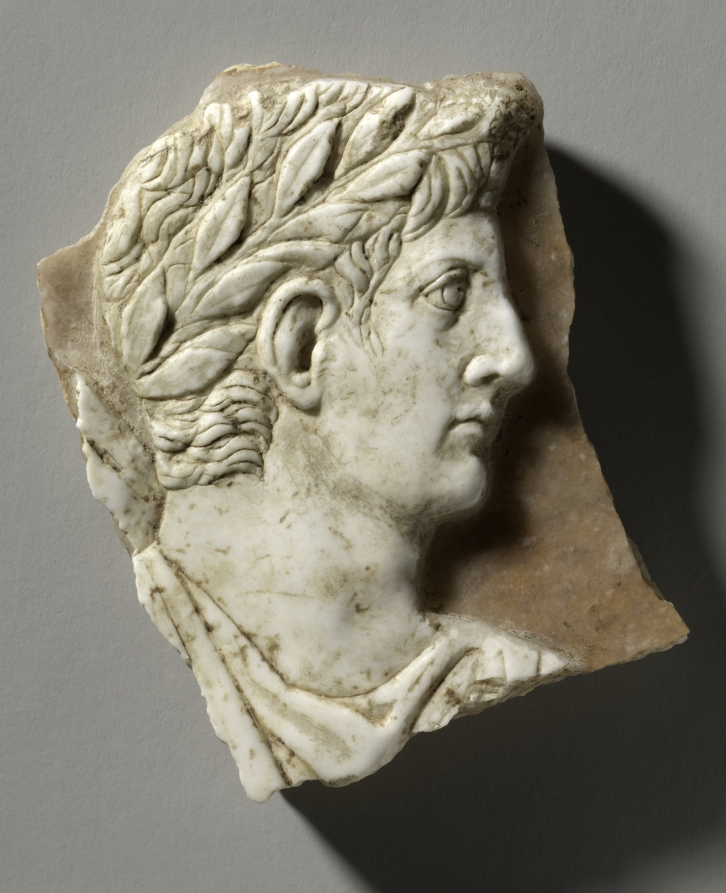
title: Cameo: Julio-Claudian Imperial Portrait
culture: Italy, Rome, Early Imperial period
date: 30 BCE–54 CE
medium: travertine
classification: Sculpture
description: This fragment of a cameo depicts a man wearing a laurel crown and facing right. Roman cameo gems were made by carving through layers of banded semiprecious stones to create an image, here a portrait in off-white with a tan background. Scholars have identified this portrait as various members of the Julio-Claudian imperial family based on the laurel crown and style of the portrait. The close-cropped wavy hair, thinly arched brow, aquiline nose, and rounded chin are similar to depictions of many Julio-Claudian princes and emperors who can only be differentiated by inscriptions. The imperial family was represented with very similar features to support a unified dynastic image.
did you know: The Julio-Claudian family included the first five emperors of Rome: Augustus, Tiberius, Caligula, Claudius, and Nero.